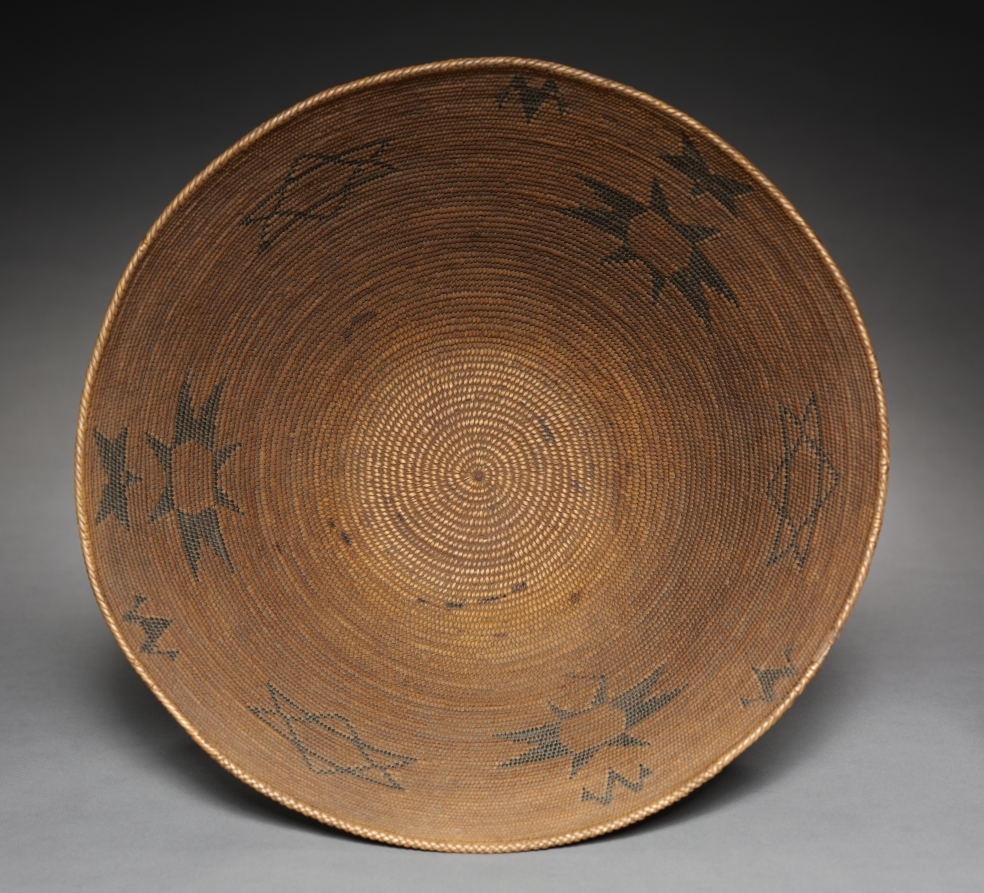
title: Cooking Bowl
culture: Great Basin, Washoe, late 19th- early 20th century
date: 1890s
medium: Willow, Bracken fern root; coiled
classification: Basketry